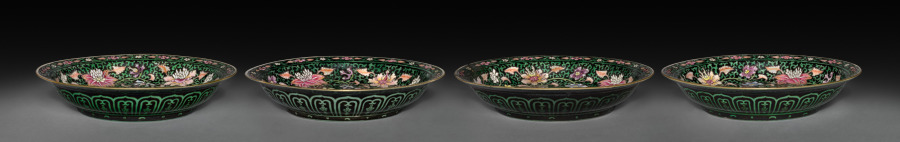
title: Set of Dishes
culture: China, Qing dynasty (1644–1911), Qianlong reign (1736–95)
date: 1736–95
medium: porcelain with famille rose overglaze enamel decoration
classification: Ceramic